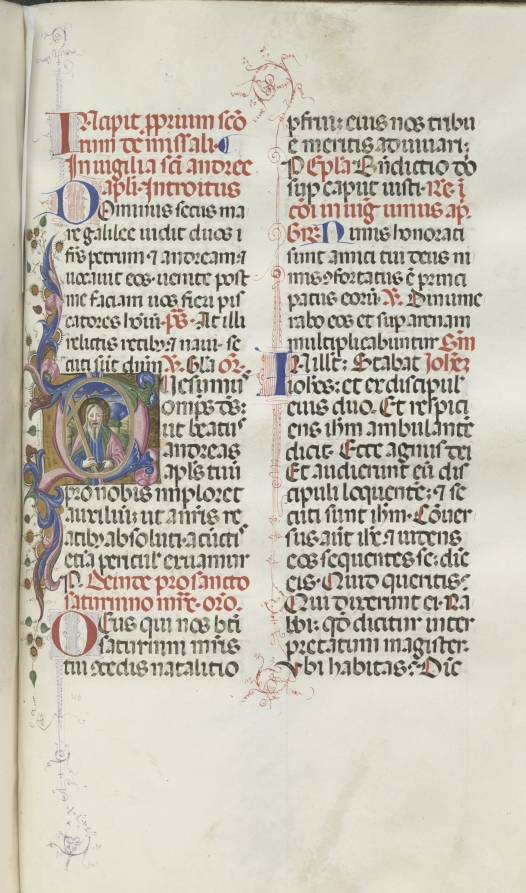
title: Missale: Fol. 259: Saint Andrew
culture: Italy, Perugia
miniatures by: Bartolommeo Caporali (Italian, c. 1420–1503)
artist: assisted by Giapeco Caporali (Italian, d. 1478)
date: 1469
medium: ink, tempera and burnished gold on vellum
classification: Bound Volume